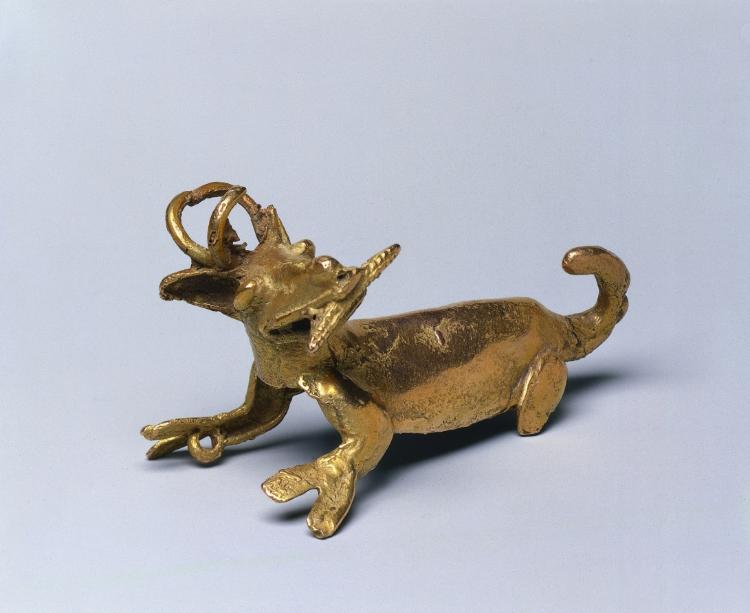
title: Deer Eating Corn Pendant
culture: Southern Costa Rica, (Diquís Region), Diquís Style, 11th-16th century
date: c. 1000–1550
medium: cast gold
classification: Metalwork